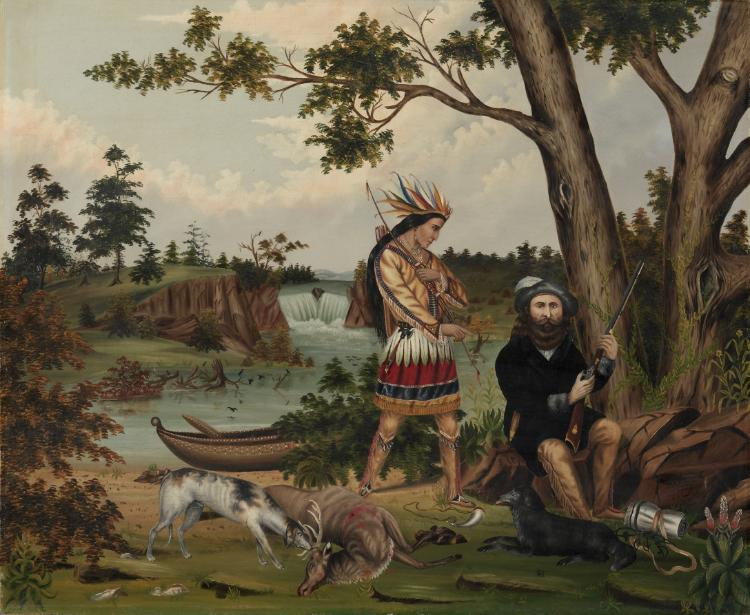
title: Hunter and Indian Guide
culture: America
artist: C. L. Woodhouse (American)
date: 1869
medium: oil on canvas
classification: Painting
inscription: inscribed at lower right: Designed.and.Executed./B.Y./C.L.Woodhouse/Artist/Apr 21.18.6.9./Lansing/ Mich